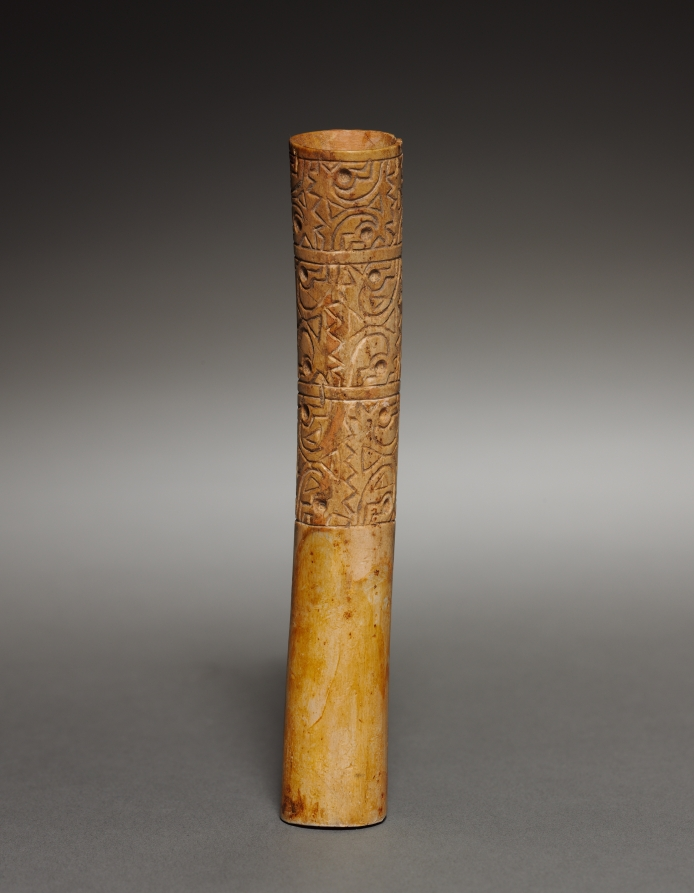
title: Ear Ornament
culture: Peru, Moche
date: 200–550 CE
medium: incised bone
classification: Jewelry